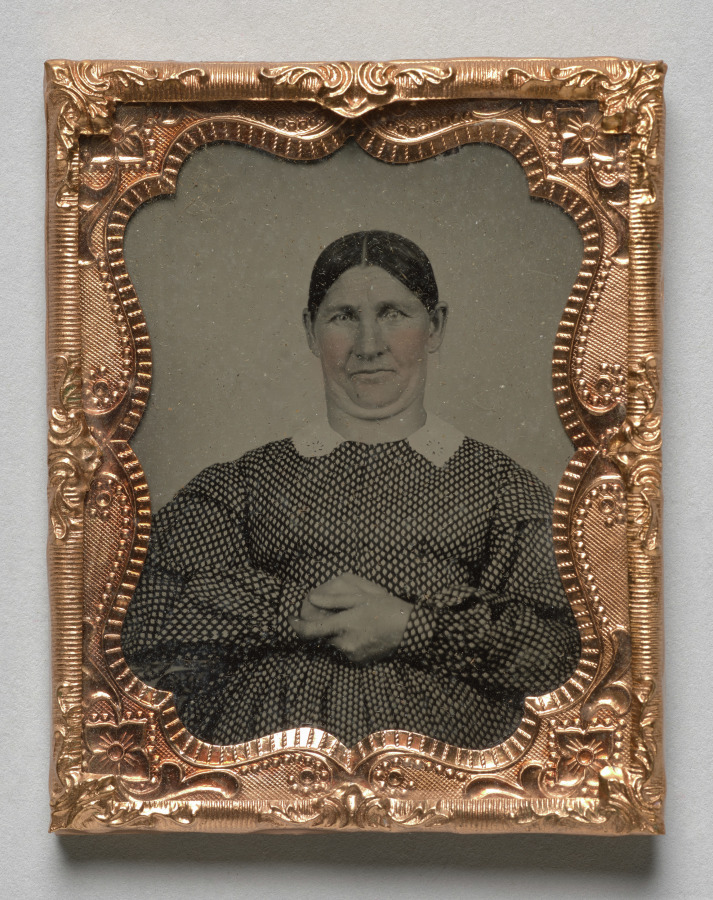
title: Wife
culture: America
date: c. 1860–65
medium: ambrotype, hand-tinted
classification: Photograph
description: You rarely see a smiling portrait from the mid-19th century. Having your photograph taken was a serious and rare endeavor, plus it was difficult to hold any animated expression long enough for the exposure times required by the early processes. Sitters were instructed to find ways to keep from moving, such as clasping their hands. The woman here has taken the photographers’ cautions to an extreme, resulting in a tense and unflattering portrait.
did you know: In the early decades of photography, many people did not know how to pose for the camera.